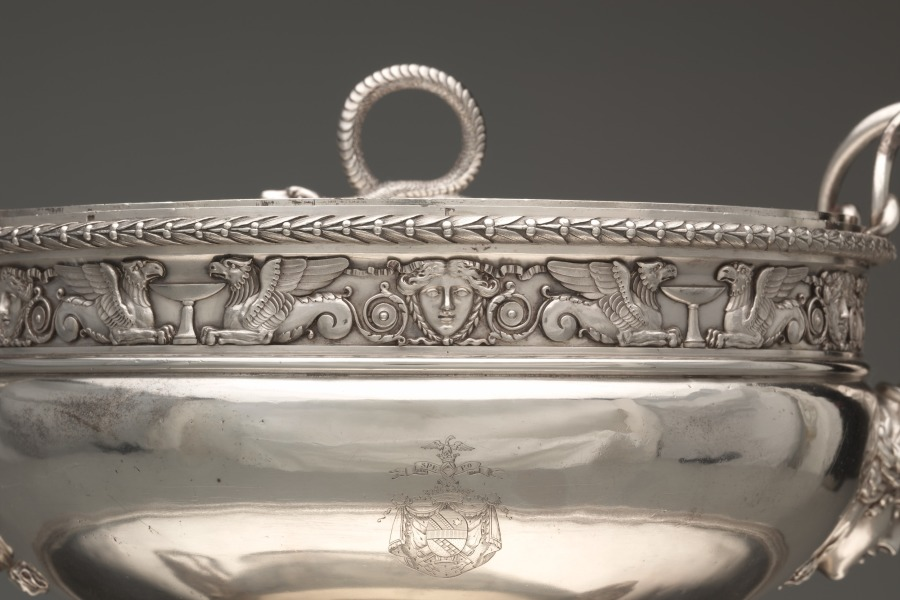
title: Covered Tureen on Stand (Pot à oille)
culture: France, late 18th-early 19th Century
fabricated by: Henry Auguste (French, 1759–1816)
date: 1797–98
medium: silver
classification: Silver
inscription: [Coat-of-arms of Amoral don Federico Carlos Gravina on bowl; cover; stand]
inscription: [Assay mark for large-sized work, 1798-1809, lining exterior; tureen foot exterior]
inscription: [Assay mark for medium-sized work, 1798-1809, beneath stand foot; on edge of cover]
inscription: [Maker's mark of Henri Auguste, master silversmith in 1785, beneath tureen foot; beneath stand foot; inside stand foot edge]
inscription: [Official assay mark for first standard silver, Paris, 1798-1809, beneath stand foot; lining exterior; on cover]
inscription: [Official mark for silver imported from countries with customs conventions, 1838-1912, beneath stand foot; edge of cover; tureen lip exterior; lining exterior; on one tureen handle; outside stand foot; tureen foot exterior]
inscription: [Unknown mark, possibly Ceres' profile in square with "E" and "7", beneath stand foot; on cover; rim of lining; tureen foot exterior; tureen lip exterior]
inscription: [Unofficial assay mark for first standard silver, Paris, 1794-1797, beneath foot stand; beneath tureen foot; near tureen handle exterior]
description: This pot-à-oille was designed by master goldsmith Henri Auguste after drawings by draftsman and sculptor Jean Guillaume Moitte. Though many of the neoclassical decorative elements on this piece are pulled from Moitte’s design, Auguste’s final product leaves out much of the proposed ornamentation. Instead this object finds distinction in its large size and smooth expanses of silver that emphasize the purity of its lines.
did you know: The coat of arms on the body of the work corresponds to the family of Federico Carlos Gravina, a Sicilian-Spanish admiral who was known to have had a close diplomatic relationship with Napoleon I.